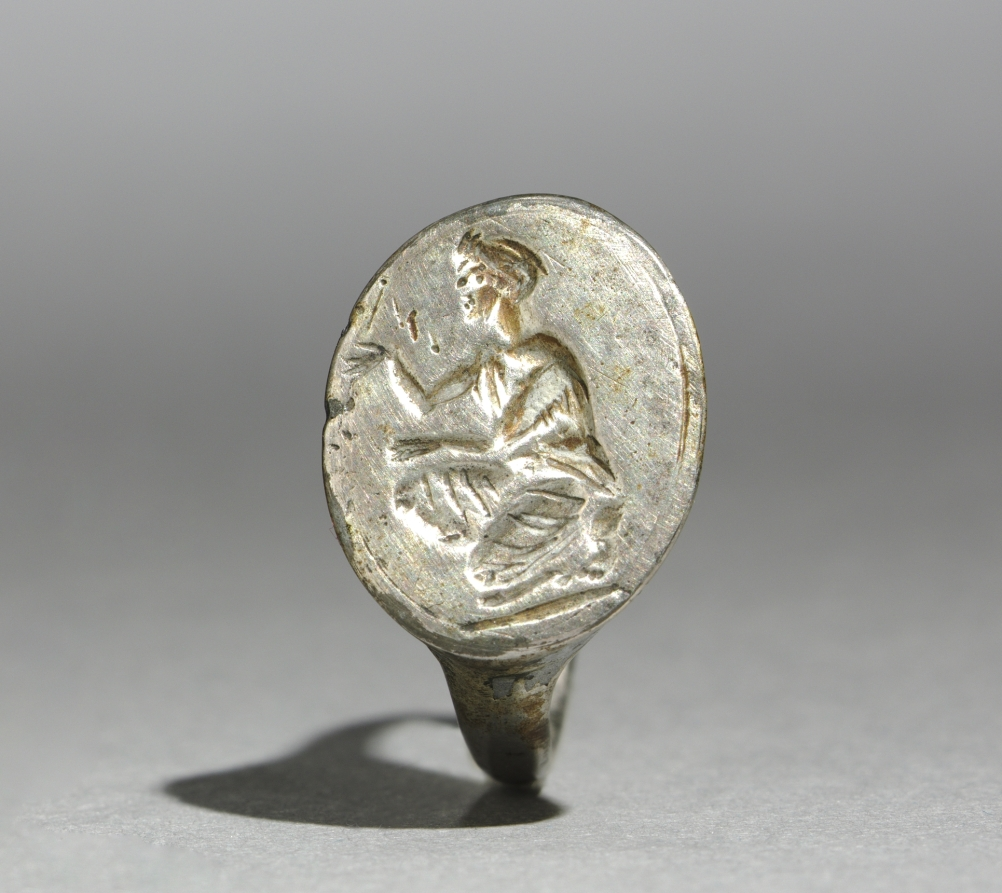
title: Finger Ring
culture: Greece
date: 300s BCE or later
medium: silver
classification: Jewelry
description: This silver signet ring depicts a kneeling figure facing left in a heavy robe, with hands outstretched and wearing a headdress. The figure is probably a priest or priestess making an offering at an unseen altar. Less skilled carving and the worn surface make the image difficult to interpret, especially the object in the figure’s right hand.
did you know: When signet rings were stamped, the image would be reversed on the stamped surface.